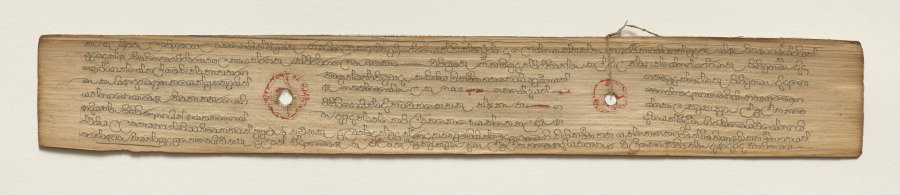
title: Leaf from a Buddhist Manuscript (verso)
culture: Sri Lanka, Singhalese, Late 17th century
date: c. 1700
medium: fiber paper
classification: Manuscript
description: Palm leaf material is still used for manuscripts in Sri Lanka. The palm leaves are prepared first by boiling them, drying them in the sun, and then rubbing them with oils. Scribes then use a metal stylus to incise the text. Then charcoal powder is wiped across the pages, filling in only the inscribed lines.